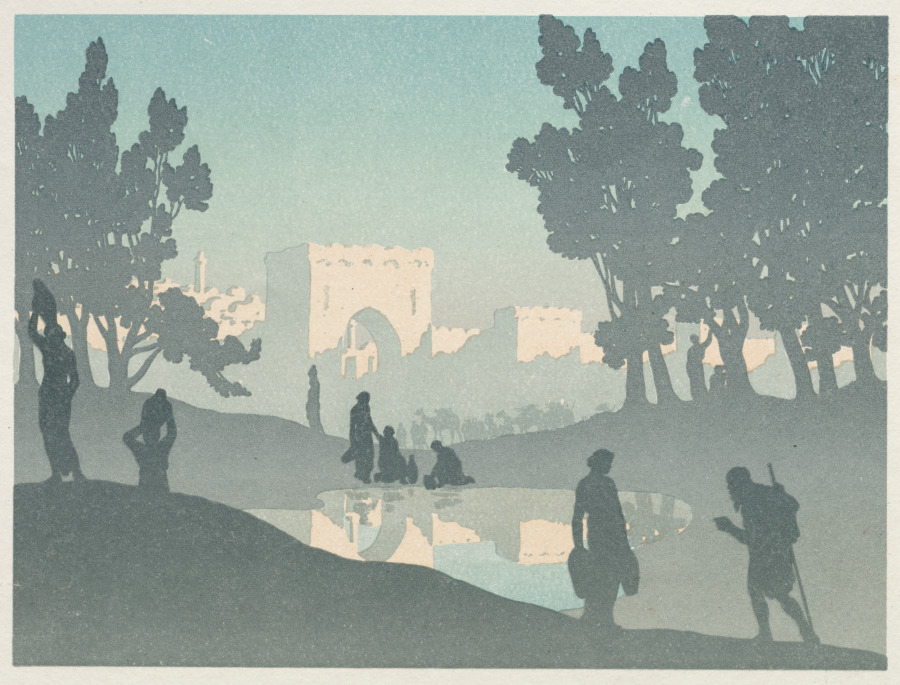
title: The Wandering Jew: The Fishermen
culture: France, 19th century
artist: Henri Rivière (French, 1864–1951)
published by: Verneau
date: 1896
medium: color lithograph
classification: Portfolio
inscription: title page is signed, in blue crayon: Henri Rivière